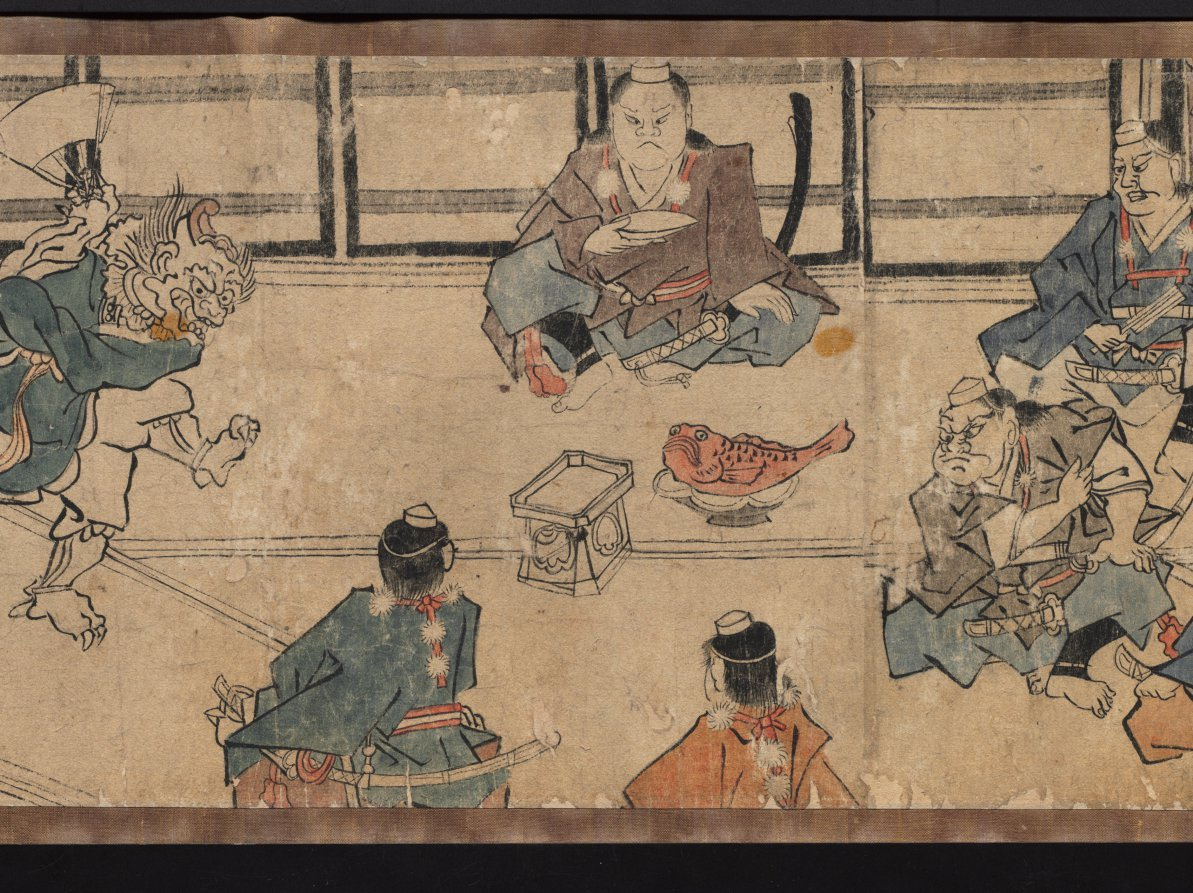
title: Oeyama Engi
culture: Japan, Edo period (1615–1868)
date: 1615–1868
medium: one of a pair of handscrolls; ink and color on paper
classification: Painting